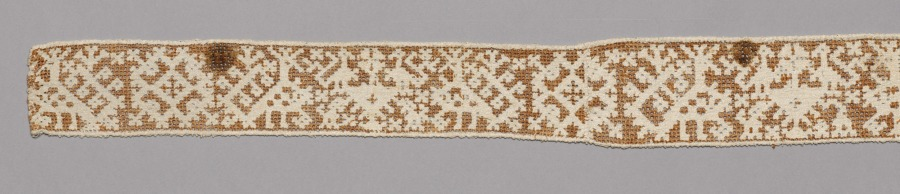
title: Lace Band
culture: Italy, Sicily, 1500s-1600s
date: 1500s-1600s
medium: Linen: needle lace (drawnwork)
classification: Lace